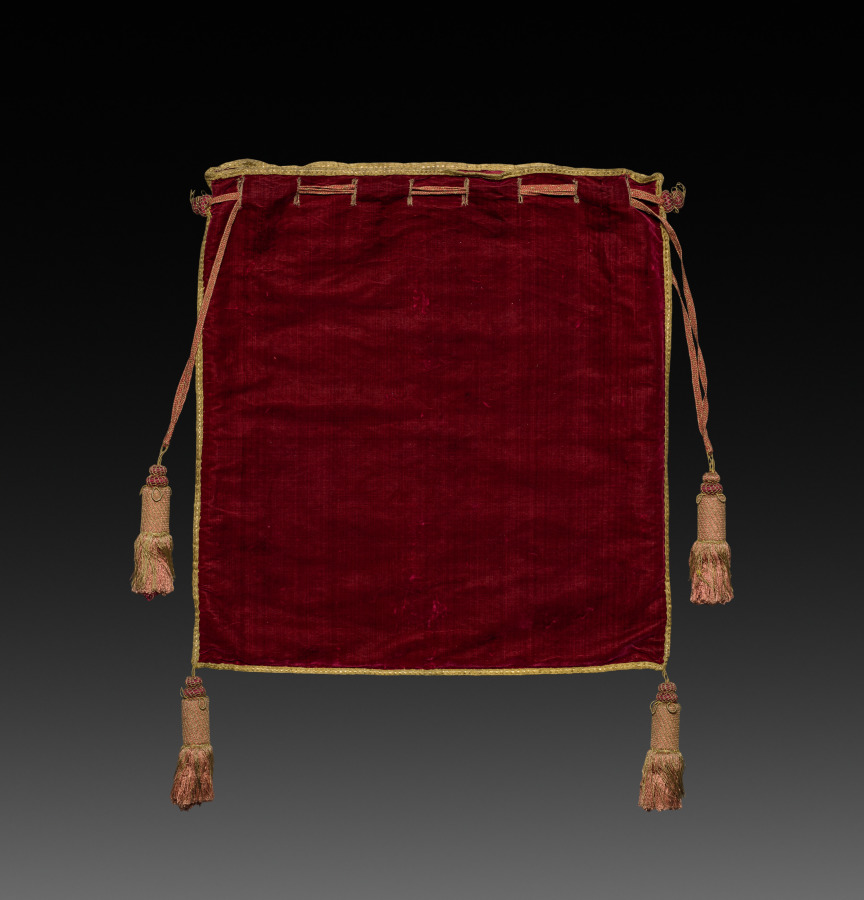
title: Cover for Lord Chancellor's Burse (Purse)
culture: England, 18th century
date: 1700s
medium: velvet; silk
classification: Velvet